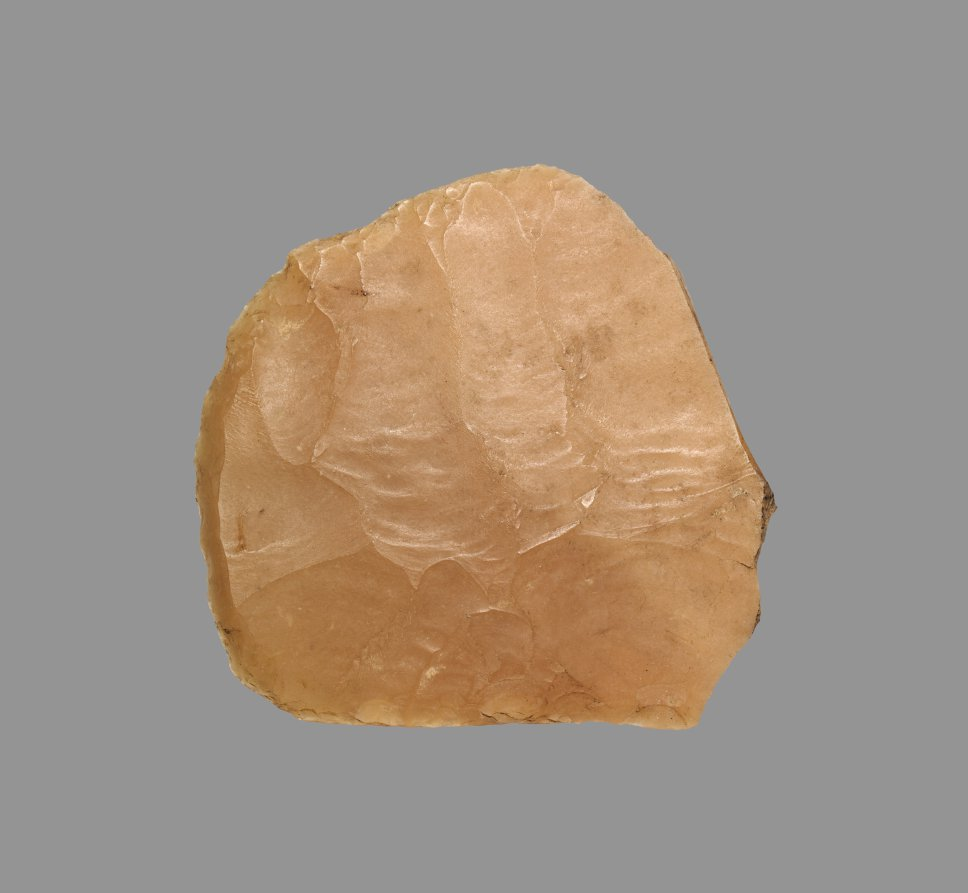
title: Sickle Blade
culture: Egypt, Middle Kingdom (2040–1648 BCE), Dynasty 12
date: 1980–1801 BCE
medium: flint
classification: Implements